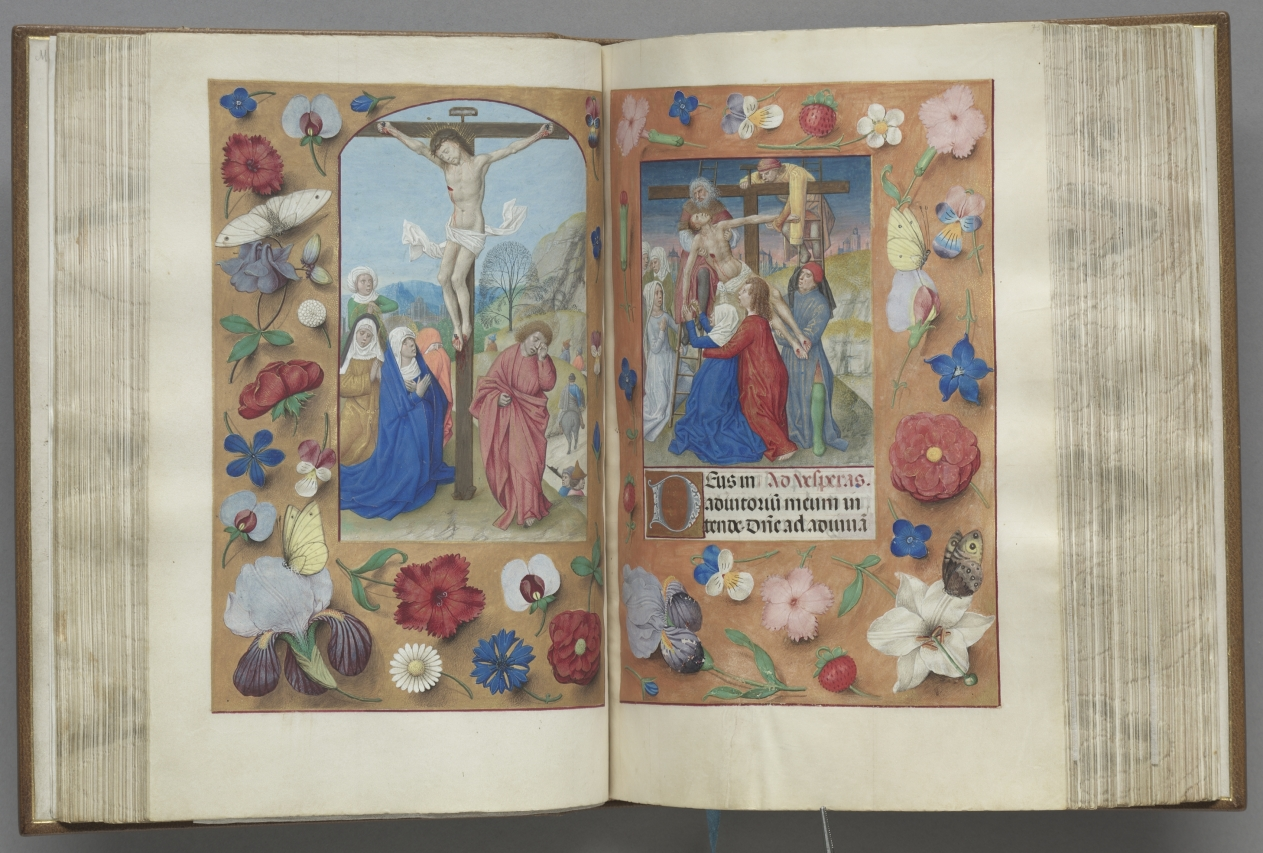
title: Hours of Queen Isabella the Catholic, Queen of Spain: Fol. 73r, Descent from the Cross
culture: Flanders, Ghent and Bruges, late 15th century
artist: Master of the First Prayerbook of Maximillian (Flemish, c. 1444–1519)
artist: and Associates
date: c. 1500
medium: ink, tempera, and gold on vellum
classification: Bound Volume